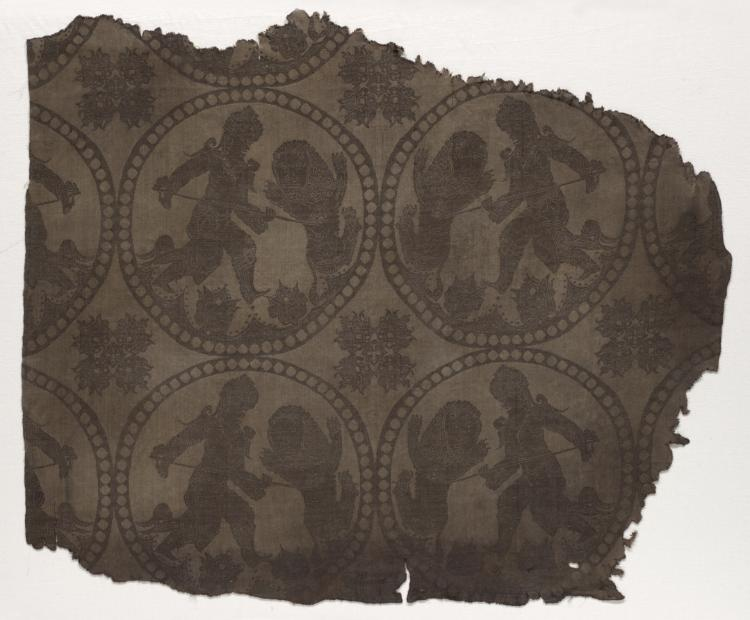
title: Roundels with King Spearing Lion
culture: Iran or Iraq, in the style of the Abbasid period (750–1258)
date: prior to 1971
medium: Silk: lampas weave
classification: Textile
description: This fragment preserves tangent and aligned roundels arranged in 3 rows. Each roundel depicts a king with an impaled lion at end of a spear; the image is reversed in alternate columns. The roundels have a pearled border. Interspaces are ornamented with a motif composed of four palmettes in an X formation.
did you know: Only one roundel is complete, but 9 other partial roundels are also preserved on this fragment.